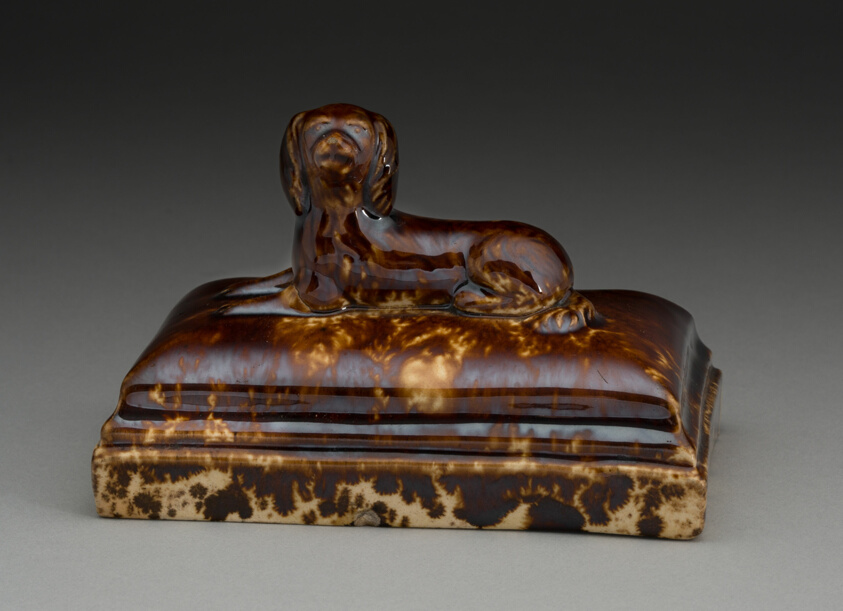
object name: Decorative Arts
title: Paperweight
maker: Lyman, Fenton & Co.; American, 1849–1852; Bennington, Vermont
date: 1849–58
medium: Earthenware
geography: Bennington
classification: paperweight; american decorative arts; american arts; ceramics; decorative arts